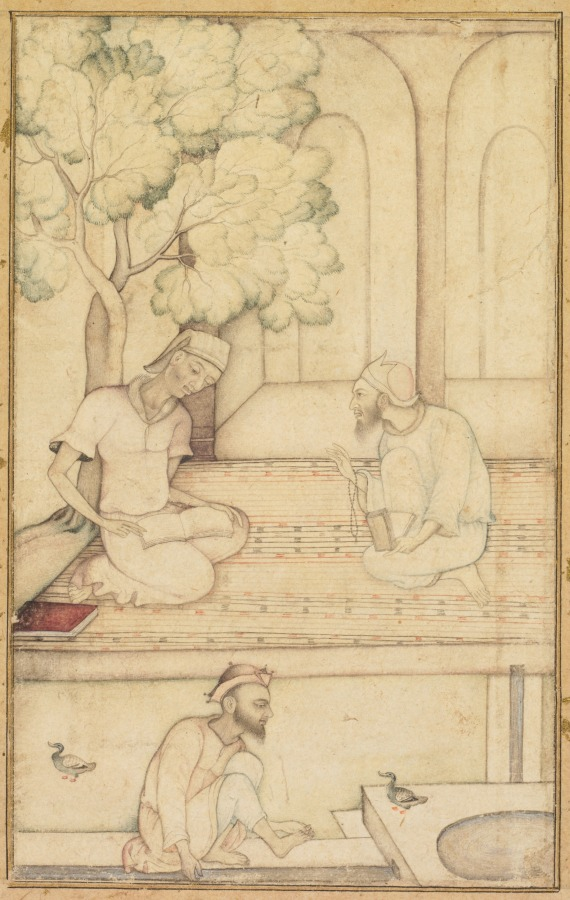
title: Kabir and Two Followers on a Terrace (recto)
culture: India, Mughal, 17th century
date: c. 1610–1620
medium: Gum tempera, ink, and gold on paper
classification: Painting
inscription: verso: four lines of nast 'aliq calligraphy with illuminated panels, with illuminated panels, ink gold and opaque watercolor on paper